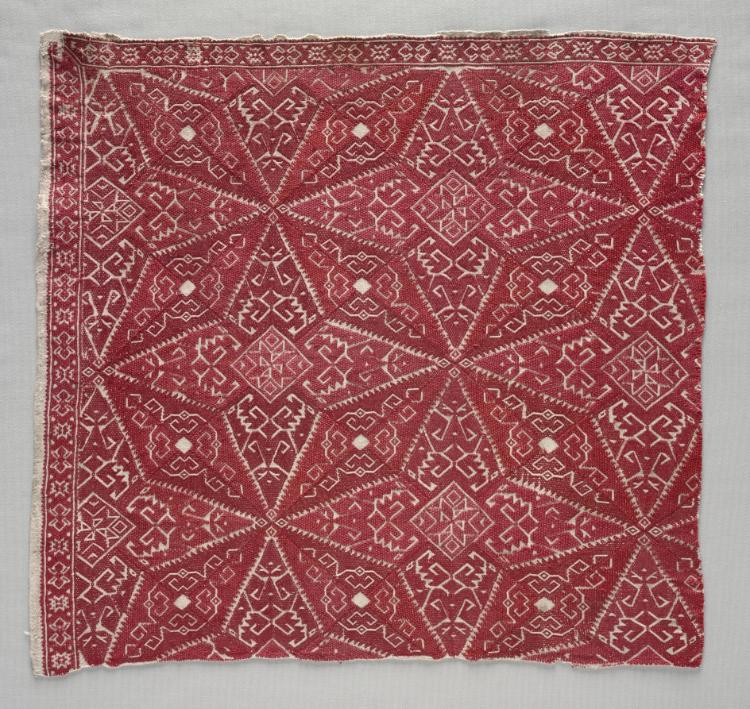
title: Fragment of a Pillow Cover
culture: Greece, Cyclades Islands, Naxos, 17th-18th century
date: 1600s - 1700s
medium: embroidery: silk on linen tabby ground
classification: Embroidery